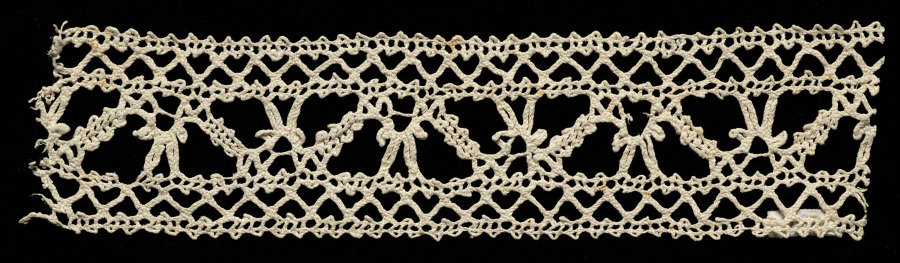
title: Lace Insertion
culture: Italy, Venice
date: 1600–1640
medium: Bobbin lace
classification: Lace